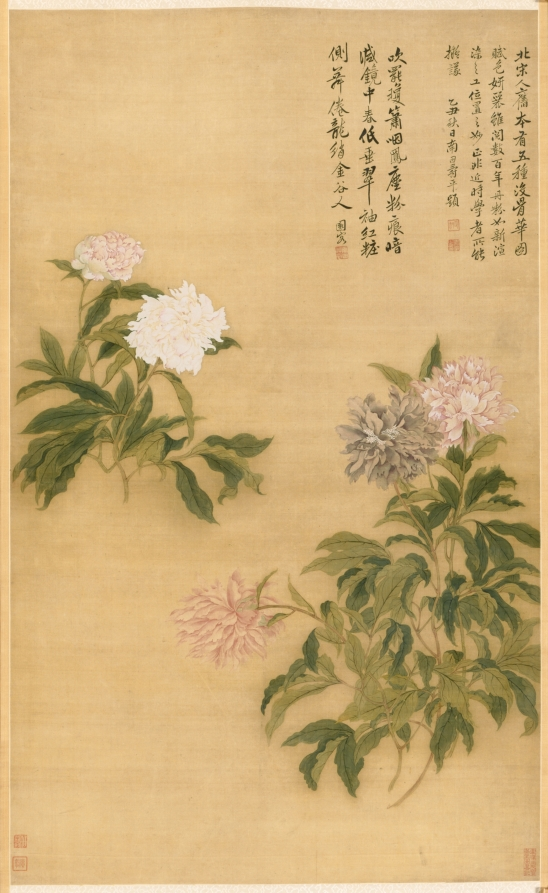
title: Herbaceous Peony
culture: China, Qing dynasty (1644-1911)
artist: Yun Shouping (Chinese, 1633–1690)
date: 1685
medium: Hanging scroll; ink and color on silk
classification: Painting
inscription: Artist's inscription, signature, and 3 seals: An old painting by an anonymous painter of the Northern Song Dynasty has five varieties of flowers painted in the boneless manner. Its colors are so beguiling and beautiful, that even after several hundred years its lead pigments are like new. The skill with which the ink and colors were applied and the subtlety of its composition find no equal among modern followers. On an autumn day in the yichou year [1685], Nantian, Shouping inscribed. [2 seals] Zhengshu; Shouping zhi yin.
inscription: Artist's poem (not translated). Signed Yuange. [seal] Nantian caoyi.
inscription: 3 additional seals of C. C. Wang 王季遷 (1907–2003).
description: Yun Shouping came from Piling (modern Changzhou), Jiangsu province, a center of floral, plant, and insect painting. He had joined the anti-Manchu resistance, was briefly imprisoned, and witnessed the death of family members in 1644. Like other artists, Yun Shouping expressed his Ming loyalism in coded pictures. The peony, king of flowers, and a spring garden motif developed new meaning during the Qing dynasty. The inscription indicates that Yun turns the flower into a motif representing the glorious past. The herbaceous peonies here appear somewhat withered and pale, with faint reddish veins running through its broken branches, perhaps a coded message. The inscription reads, An old painting by an anonymous painter of the Northern Song Dynasty has five varieties of flowers painted in the boneless manner. Its colors are so beguiling and beautiful, that even after several hundred years its lead pigments are like new. The skill with which the ink and colors were applied and the subtlety of its composition find no equal among modern followers.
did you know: In East Asian art, peonies traditionally symbolize prosperity and wealth.